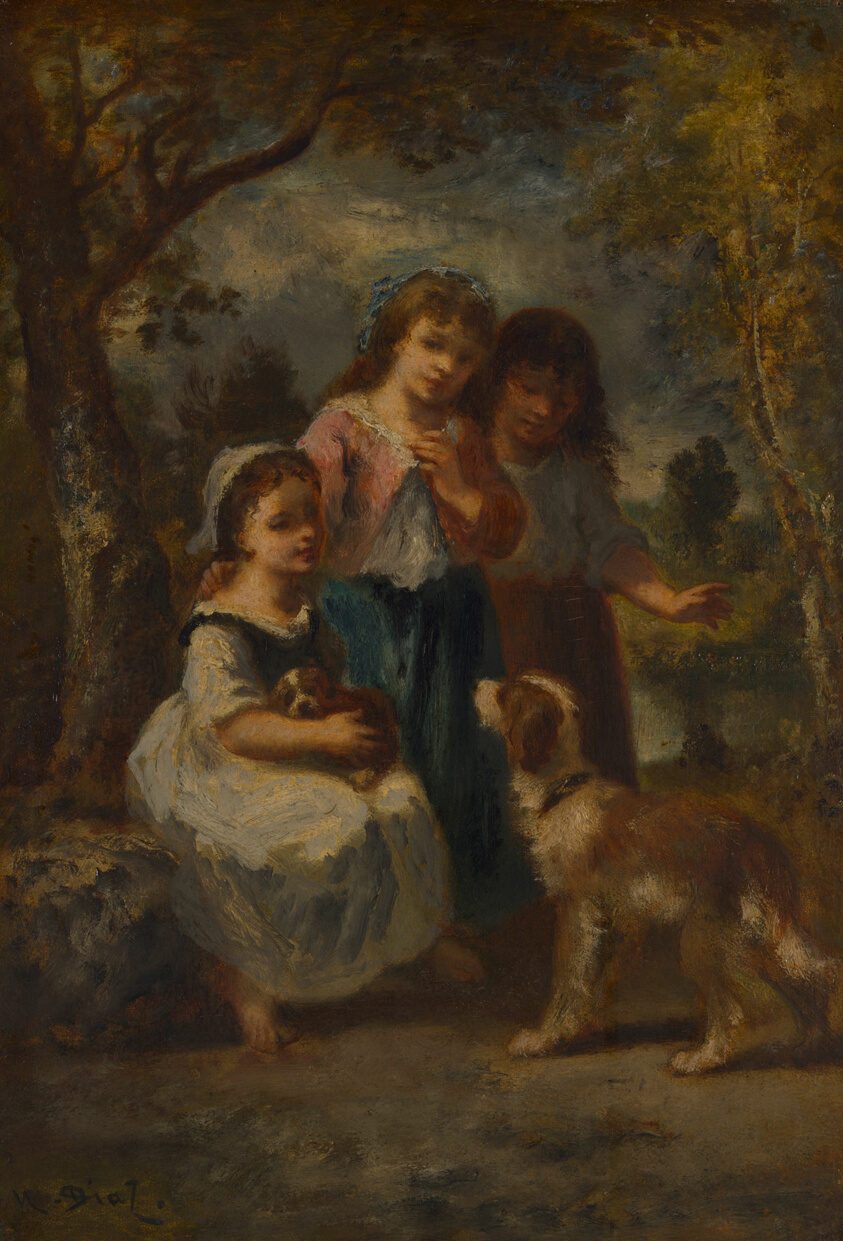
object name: Painting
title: Three Little Girls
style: nineteenth century, 19th century, Barbizon School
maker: Narcisse Virgile Diaz de la Peña (French, 1807–1876)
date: c. 1870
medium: Oil on panel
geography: France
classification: oil on panel; french; oil paintings (visual works); paint; painting; european painting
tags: children, French, animals, dog, dogs, girl, girls, nature, trees